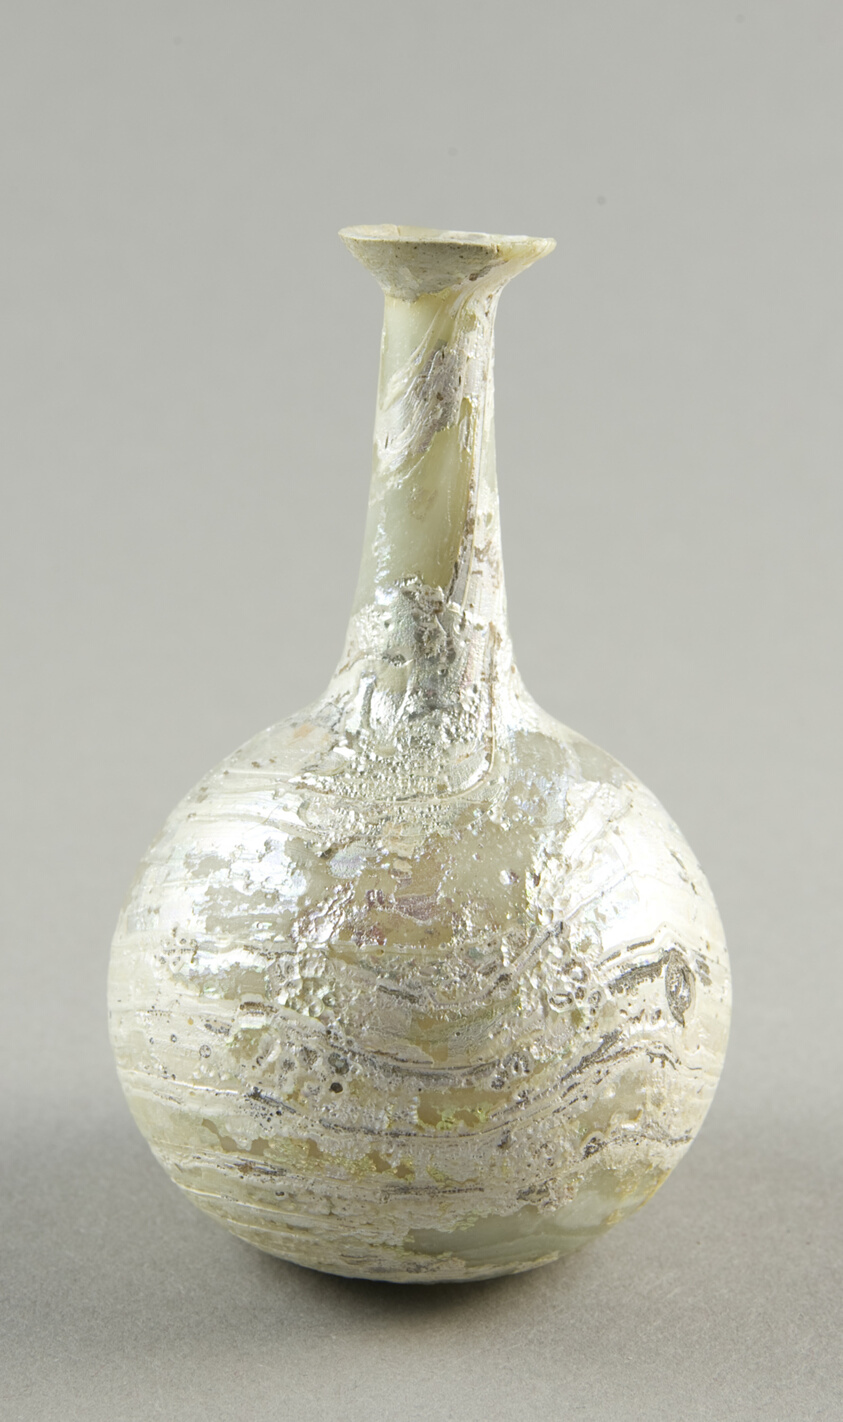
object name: Vessel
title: Bottle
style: syrian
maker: Roman; Levant or Syria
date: 1st century BCE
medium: Glass, blown technique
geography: Syria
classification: bottle; glass; vessel; ancient art